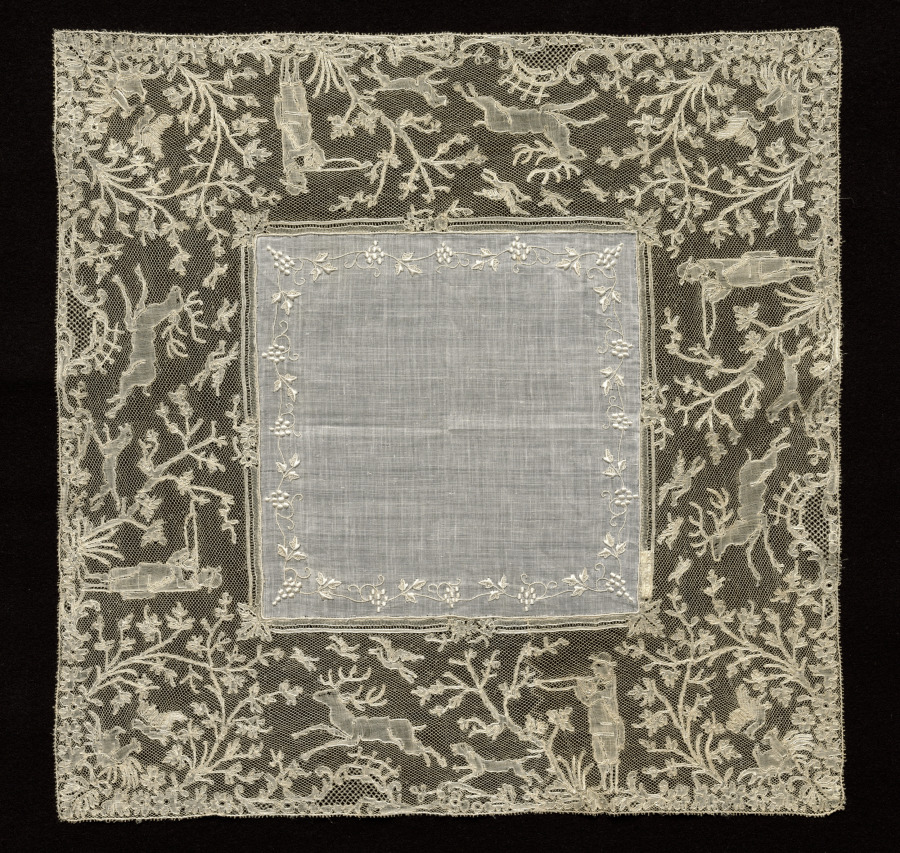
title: Lace Handkerchief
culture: Belgium, Mechelen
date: 1800s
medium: Plain weave linen center with bobbin lace (Mechelen lace) edging and embroidery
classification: Lace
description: The Mechelen lace border of this handkerchief depicts a hunting scene.